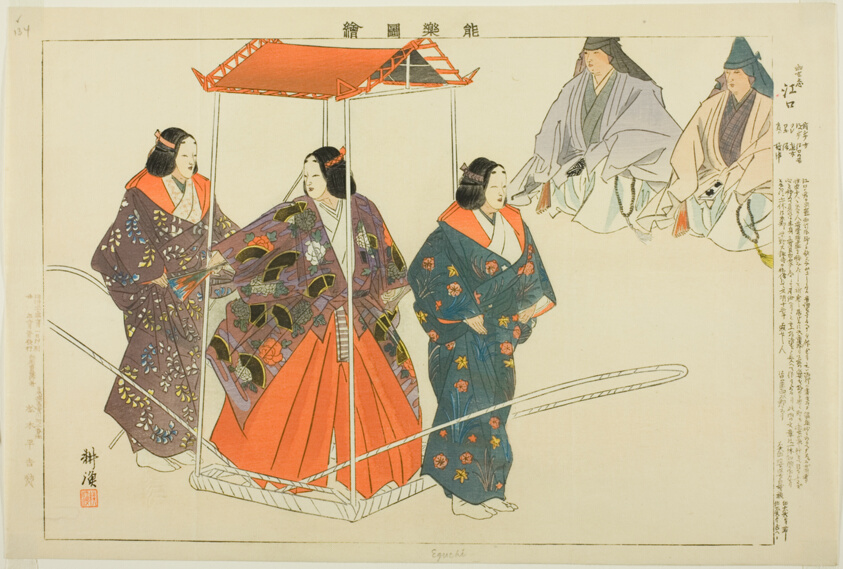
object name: Print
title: Eguchi, from the series "Pictures of No Performances (Nogaku Zue)"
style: Japanese (culture or style)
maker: Tsukioka Kogyo; Japanese, 1869-1927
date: 1898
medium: Color woodblock print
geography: Japan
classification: woodblock print; print; asian art